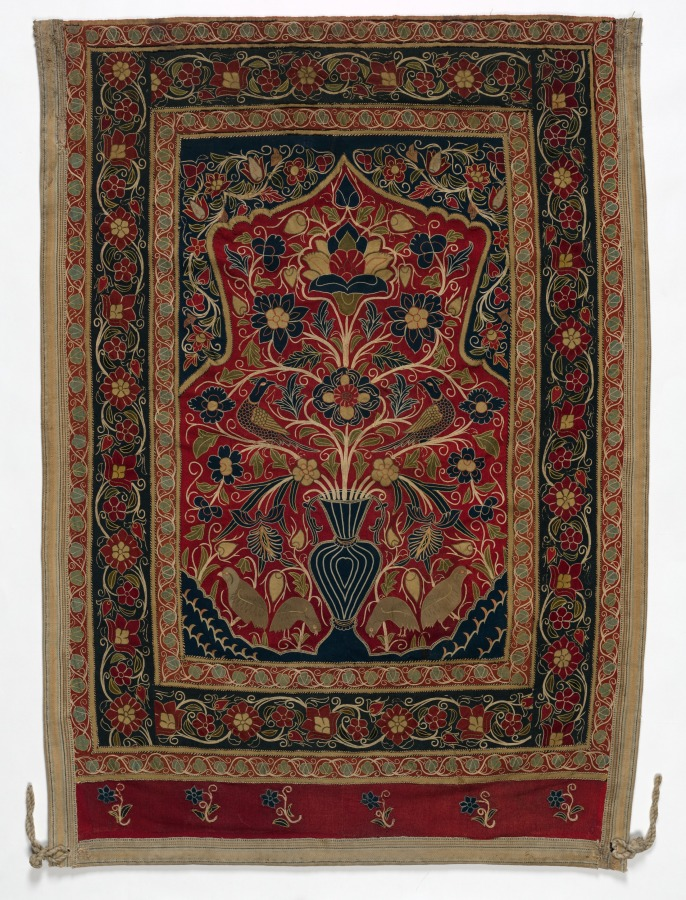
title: Royal Round Tent made for Muhammad Shah (wall panel with one design unit)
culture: Iran, Rasht, Qajar period (1779-1925)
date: 1834–48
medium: Interior: wool: plain weave, inlaid work; silk: embroidery, chain stitch; tape, leather; Exterior: cotton, wool: plain weave; rope, iron ring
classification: Textile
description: Royal tents were potent symbols of authority, wealth, and power throughout the greater Middle East. Rulers owned thousands of tents. They were used for shelter, shade, and innumerable functions in tent compounds that were essential for imperial ceremonies, travel, and military campaigns. Distinguished by size with elaborately decorated interior walls and ceilings, tents could be as large as castles. Opulent tents were also presented as imperial gifts. Tents are only known through documents before 1600. For example, in Baghdad in 809, Caliph Harun al-Rashid owned 4,000 ceremonial tents and 150,000 camping tents that were stored in the imperial Abbasid treasury. An astonishing variety and quantity of tents were housed in the royal Fatimid tent storeroom in Cairo in 1068-69, including "military tents, fortress tents, and castle tents, manufactured of . . . gold-brocaded stuff embroidered with designs of elephants, wild beasts, horses, peacocks, birds." Since 1600, Ottoman Turkish tents with elaborate floral decoration have been preserved in Istanbul in the Topkapi Palace Museum and Military Museum, and in European collections as war booty, primarily from the Ottoman Turks' attempt to conquer Vienna in 1683. These tents are not done in the Rasht technique, but rather are applique. In contrast, royal tents from Iran are extremely rare. This spectacular ceremonial tent is embroidered with the name of its owner, Muhammad Shah, who ruled Iran from 1834 to 1848 during the Qajar dynasty. The radiant jewellike interior features exuberant flora, blossoming vines, and robust birds made with colored wool embellished with silk-thread embroidery.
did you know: Rasht work is named after the city on the Caspian Sea in present-day Iran, which was a major silk trade center with numerous textile workshops.